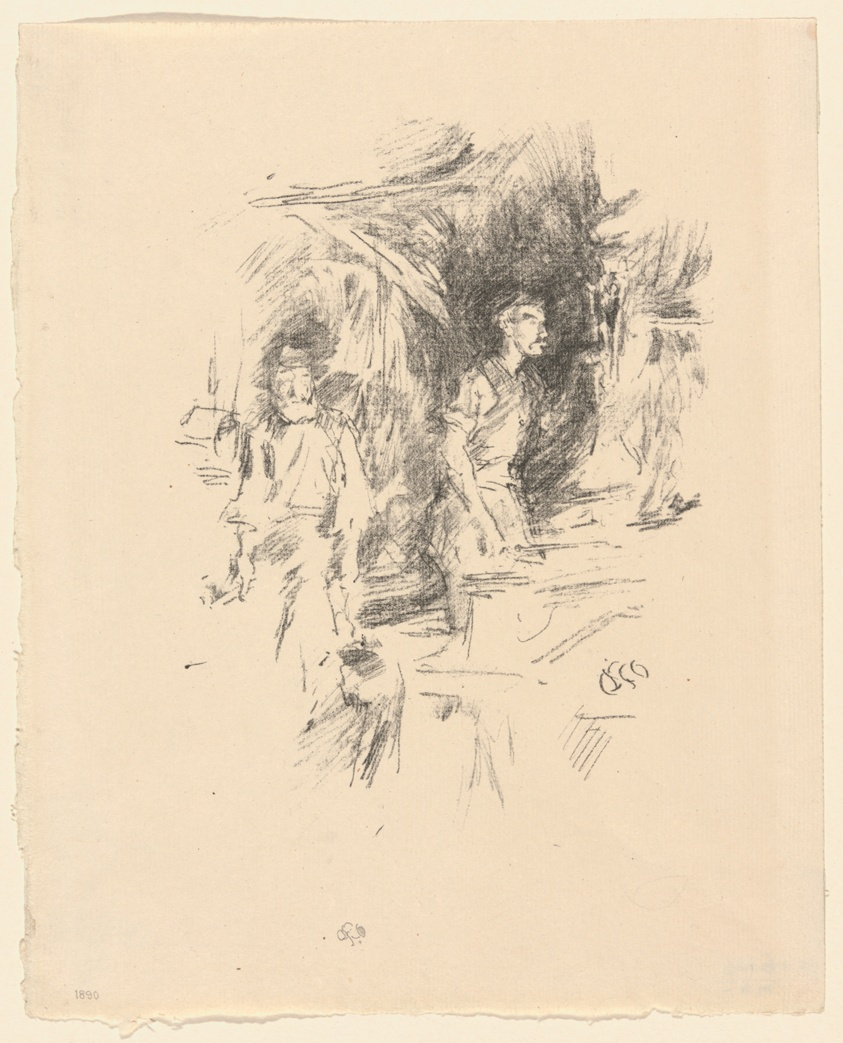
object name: Print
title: The Old Smith's Story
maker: James McNeill Whistler (American, 1834-1903)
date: 1895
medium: Transfer lithograph in black on cream laid paper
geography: United States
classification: transfer lithograph; lithograph; print; prints and drawing; paper